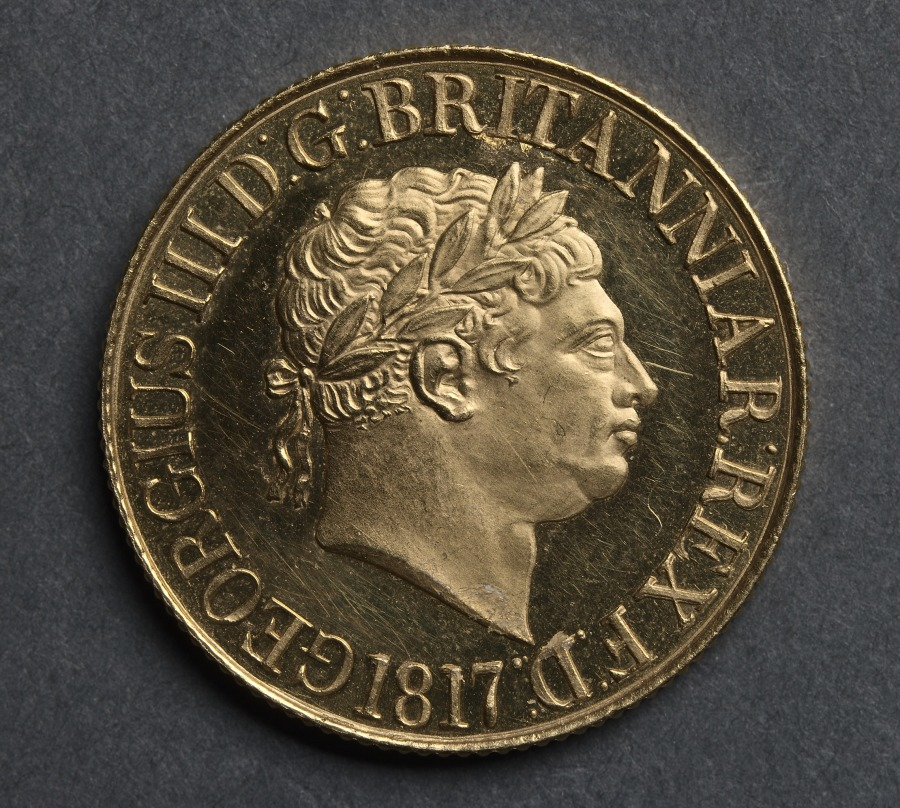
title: Sovereign: George III (obverse); St. George and the Dragon (reverse)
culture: England, George III, 1760-1820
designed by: after Benedetto Pistrucci (Italian, 1784–1855)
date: 1817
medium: gold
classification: Coins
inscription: GEORGIUS III D.G. BRITANNIAR. REX F.D.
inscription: HONI ∙ SOIT ∙ QUI ∙ MAL ∙ Y ∙ PENSE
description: Great changes had occurred since King George III's previous coinage. The Royal Mint had moved out of the Tower of London to new premises in Little Tower Hill. The new mint was fitted with the latest steam-driven machinery by Boulton and Watt, and the whole coinage had been reformed. The guinea of twenty-one shillings was replaced by the sovereign, the pound unit piece, designed by Benedetto Pistrucci, and went into circulation in 1817. The new Royal Mint was placed under the Mastership of William Wellesley Pole, later Lord Maryborough and finally the third Earl of Mornington, an elder brother of the famous Duke of Wellington. Pole was so impressed by a cameo of Saint George and the dragon, cut by Pistrucci, that he invited the artist to England and set him to design the new coinage. For legal reasons Pistrucci could not be appointed chief engraver, which started a quarrel between the artist and the government that lasted nearly 40 years until the Pistrucci's death in 1855. Working with, and often against, various members of the family who held a succession of engraving appointments at the Royal Mint, Pistrucci produced the new coinage of the reign of George III. His magnificent Saint George, seen to its best on this very rare piece, continued to be used from time to time. It is still the reverse type of the British sovereign.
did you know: Benedetto Pistrucci's portrait of the king is a caricature.